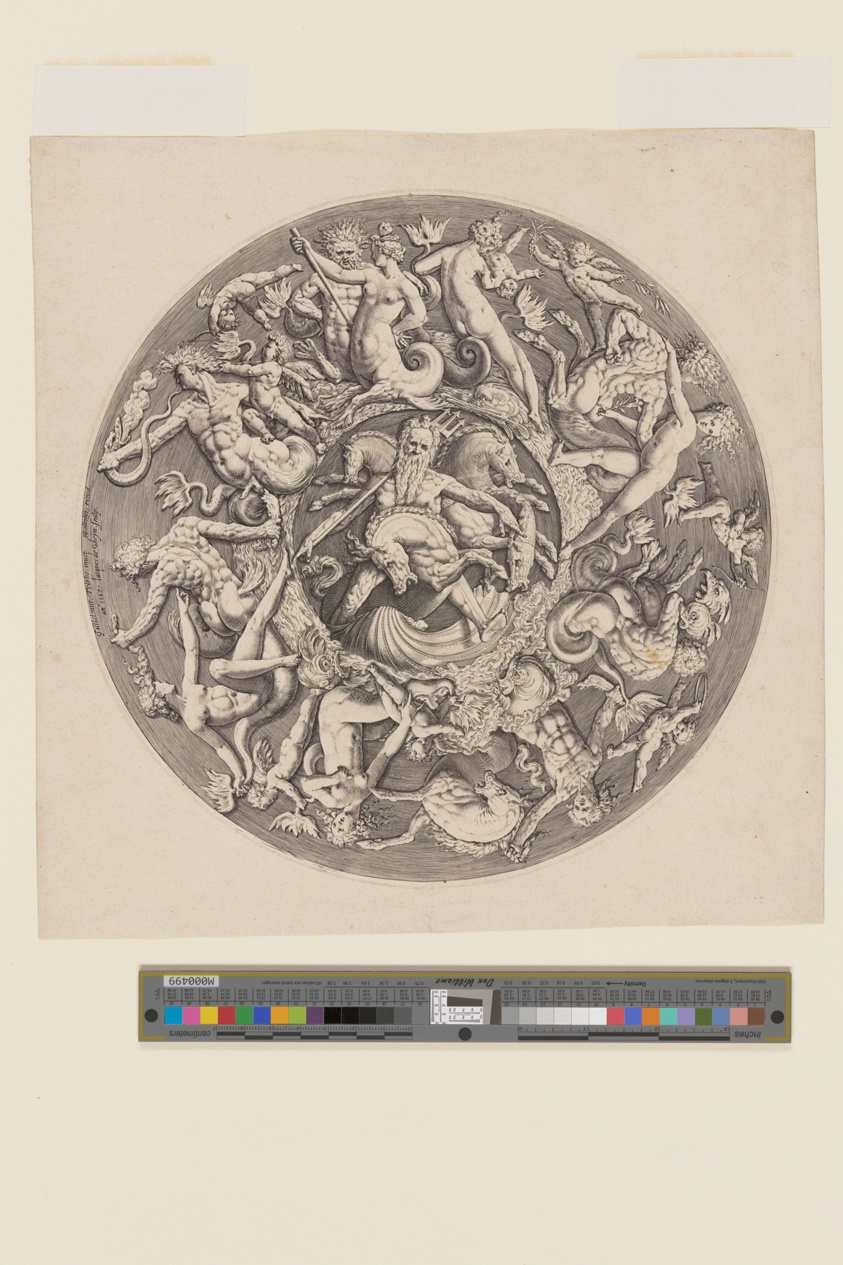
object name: Print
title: Neptune’s Kingdom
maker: Jacques de Gheyn II (Dutch, 1565–1629); after Willem Danielsz. van Tetrode (Dutch, c. 1505/10-1580/88)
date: 1587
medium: Engraving on ivory laid paper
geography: Netherlands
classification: engraving; paper; print; prints and drawing